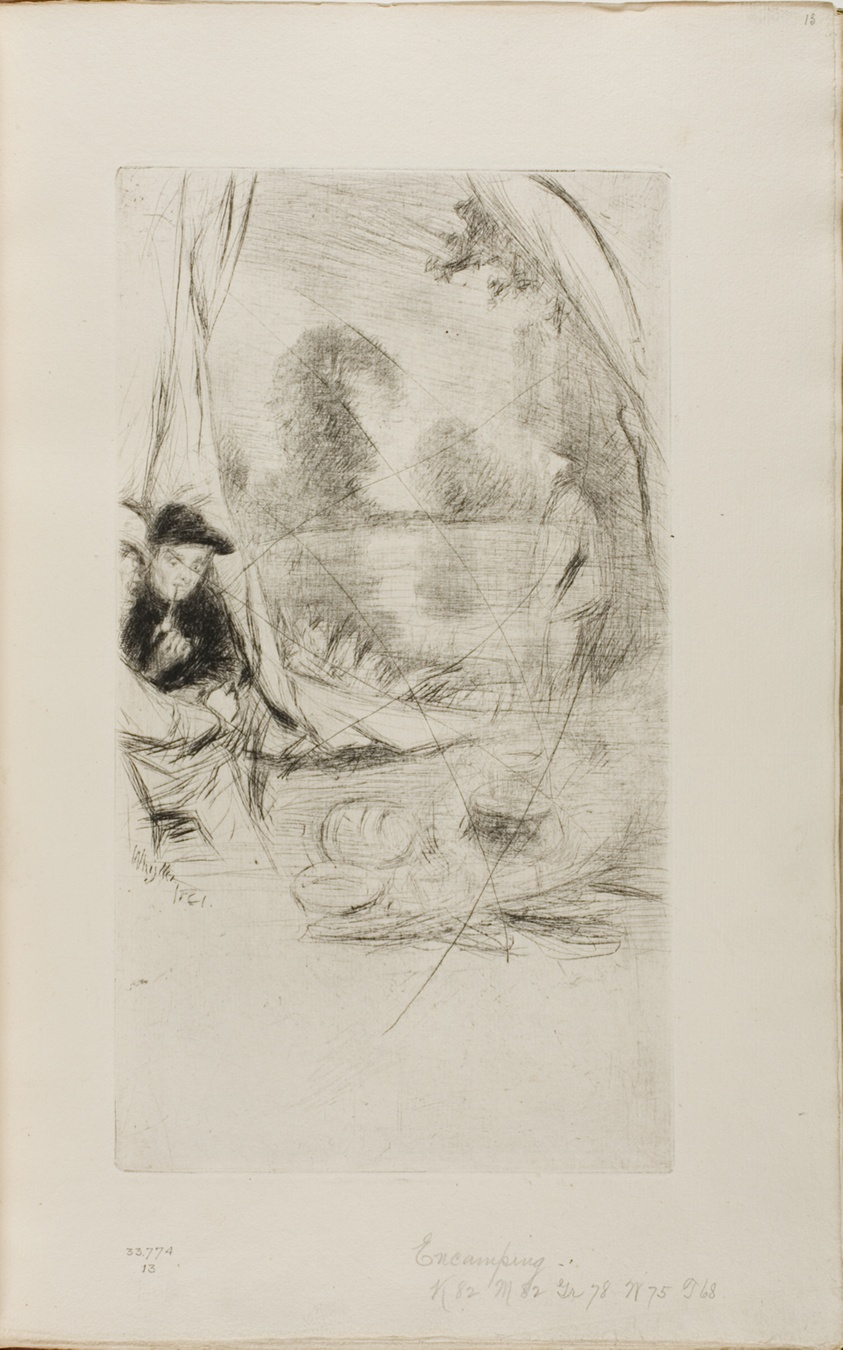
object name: Print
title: The Camp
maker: James McNeill Whistler (American, 1834-1903)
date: 1861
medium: Drypoint, with drypoint cancellation lines, in black ink on ivory laid paper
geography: United States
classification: drypoint; prints and drawing; book; print; paper